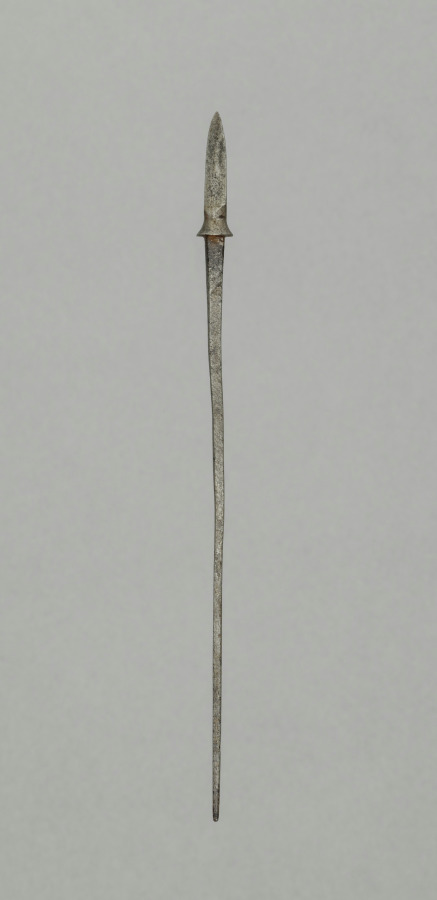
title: Arrow Point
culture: Japan, Edo period (1615–1868)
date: 1700s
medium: steel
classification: Arms and Armor